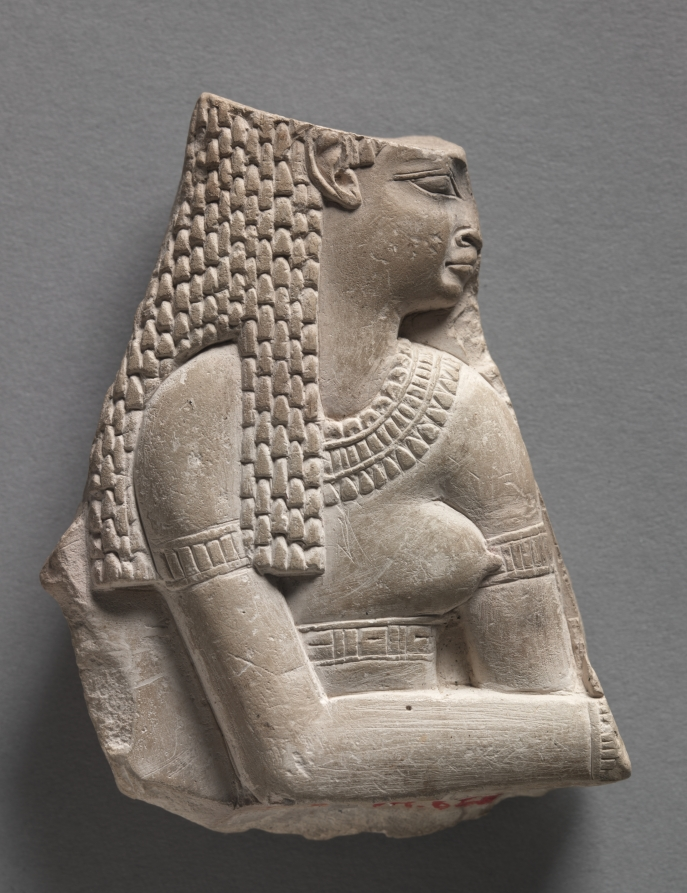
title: Double-Sided Votive Relief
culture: Egypt, Greco-Roman period (332 BCE–395 CE), Ptolemaic dynasty (305–30 BCE)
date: 305–30 BCE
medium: limestone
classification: Sculpture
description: Trial pieces—carved on limestone flakes, or ostraca—and sculptors' models allow us to see how the ancient Egyptian artist approached his work. The four heads—a king, a shaven-headed priest, and two foreigners—on this large trial piece were doubtless practice sketches but nonetheless show the learner's keen eye for detail and for distinguishing different facial types. Others, such as the wild dog's head and the profile of a king in relief, are masterpieces in their own right, and were probably meant to be copied. The sculpture of a lion was left unfinished, which makes it even more intriguing; even in its roughed-out-state it is a majestic figure. The back of this piece is carved in the figure of a goddess.